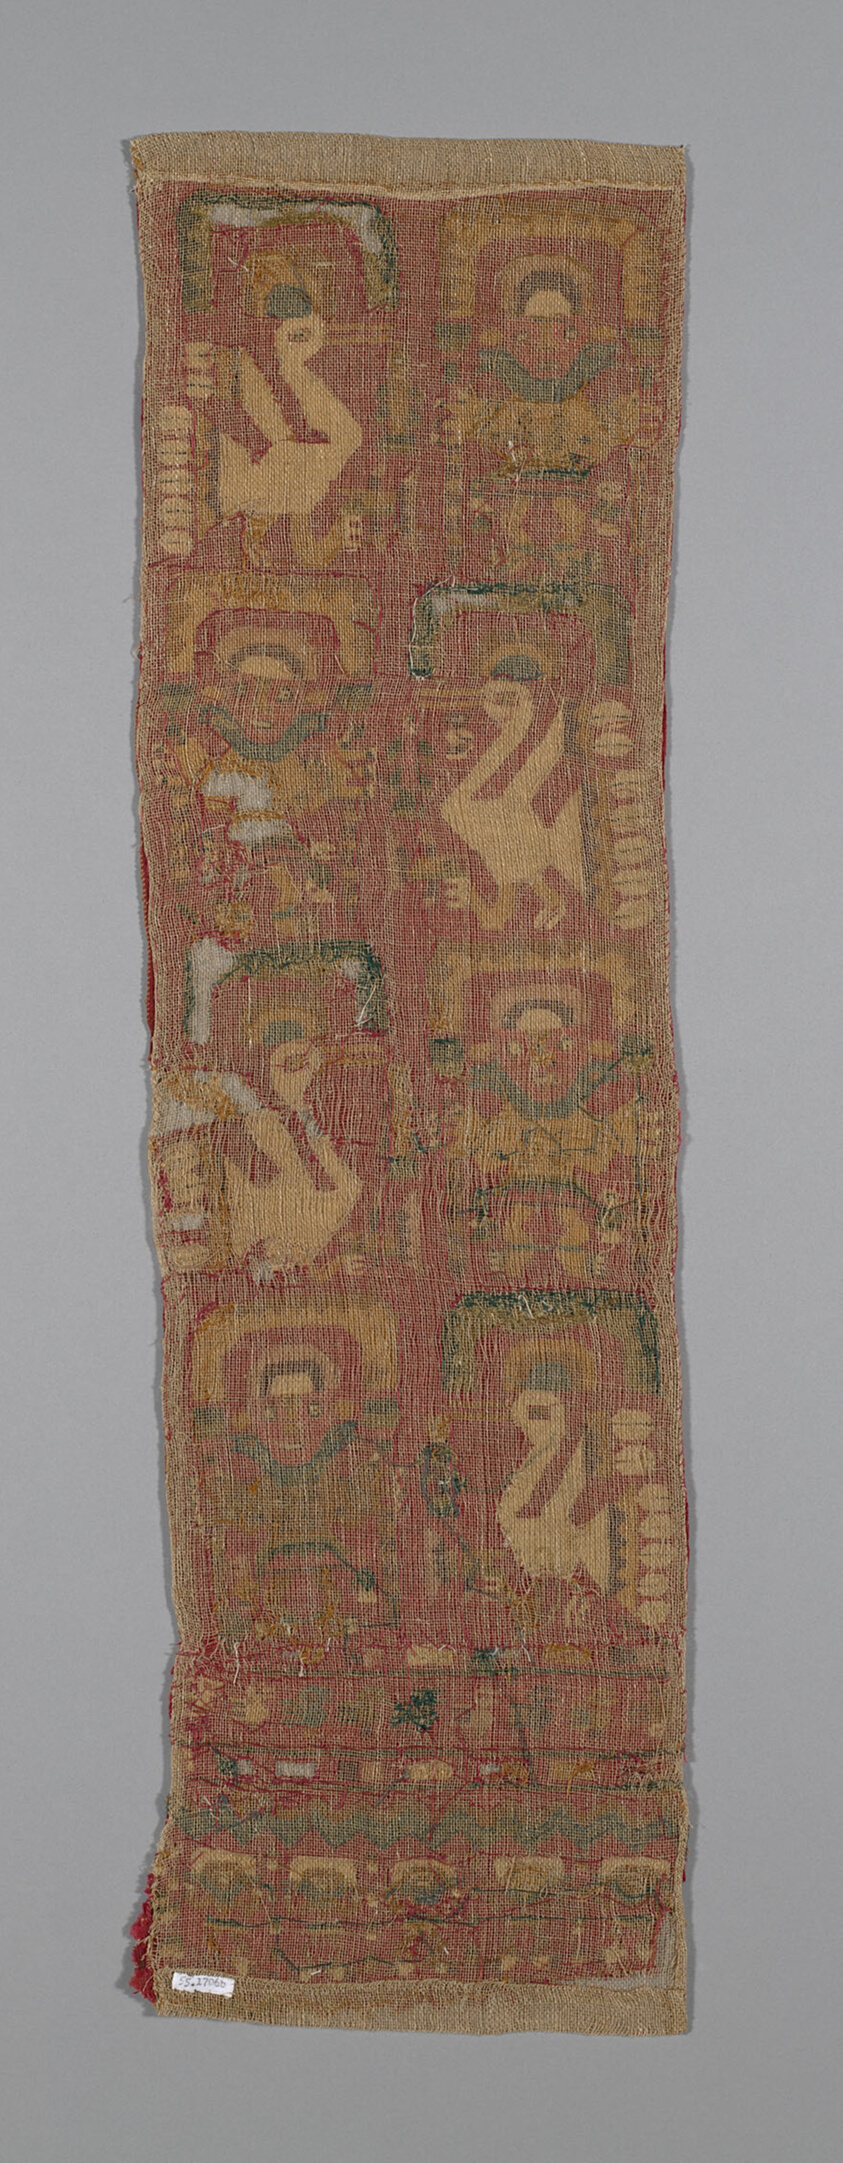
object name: Textile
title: Panel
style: lambayeque, Pre-Columbian, middle horizon, americas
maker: Lambayeque (North coast, Peru)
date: 1000/1476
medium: Cotton and wool (camelid), slit tapestry weave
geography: Peru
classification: weaving; textile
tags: birds, animals, staffs, fish, anthropomorphic figure, geometric motif, headdresses, human, super/natural